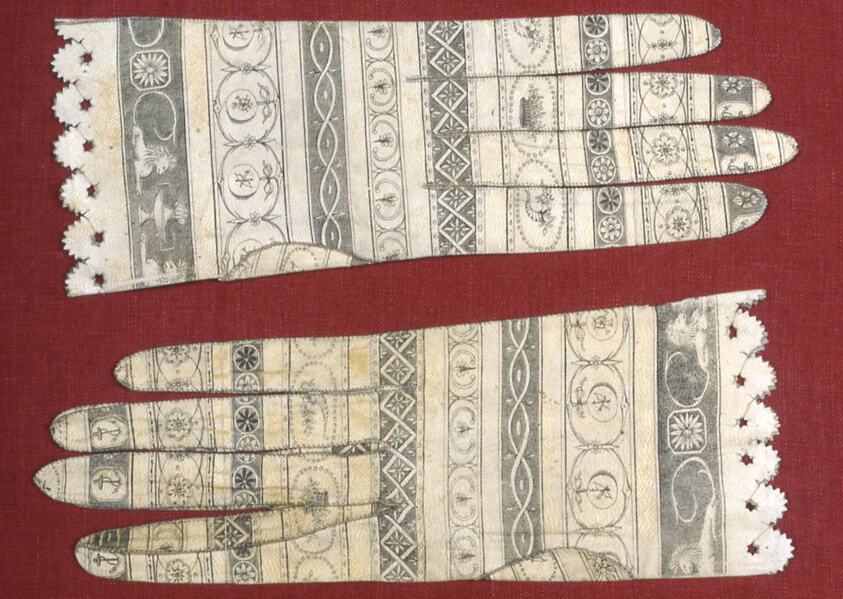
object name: Costume and Accessories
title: Pair of Gloves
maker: Spain, Barcelona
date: c. 1800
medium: Leather, copperplate printed; punched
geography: Barcelona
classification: textile; costume accessory; costume